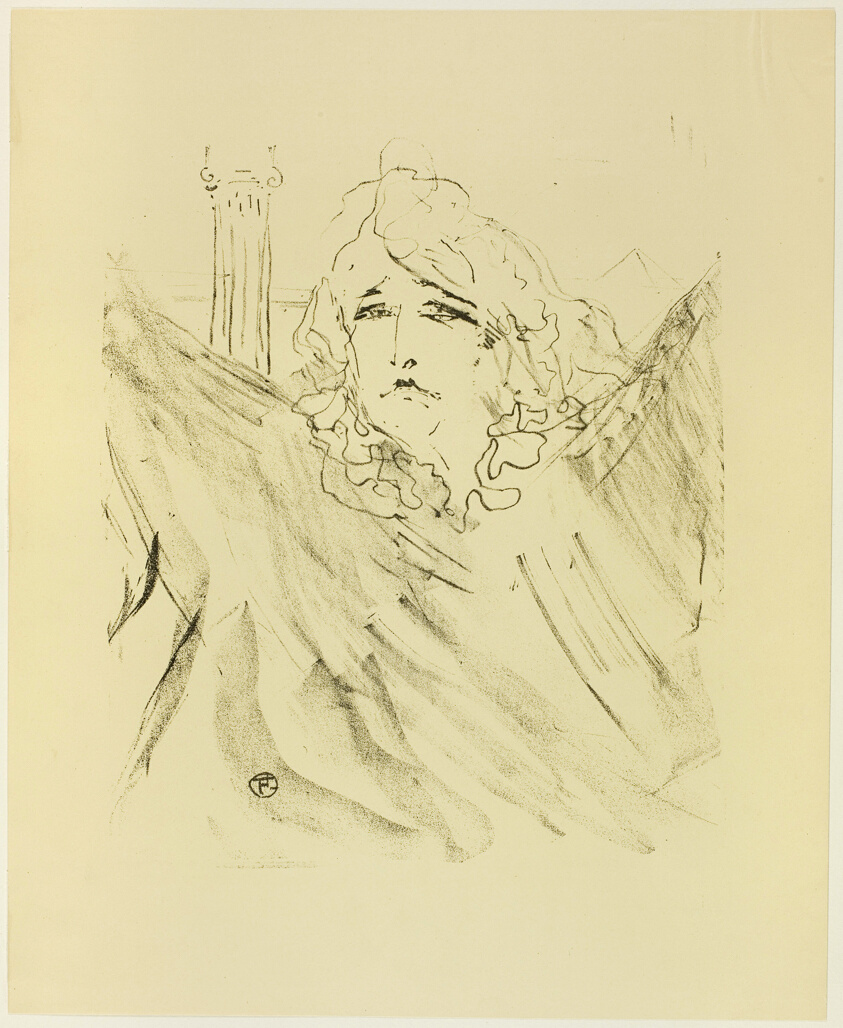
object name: Print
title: Sarah Bernhardt, from Treize Lithographies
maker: Henri de Toulouse-Lautrec (French, 1864-1901)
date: 1898, published before 1906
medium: Lithograph on cream wove paper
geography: France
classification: lithograph; print; prints and drawing